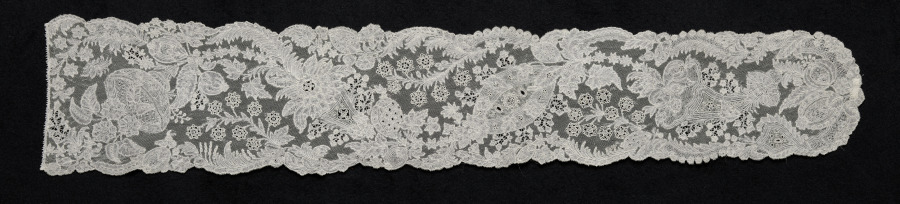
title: Lace Lappet (one of a pair)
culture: Belgium, Brussels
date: 1730s–40s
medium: noncontinuous bobbin lace (Point d'Angleterre) (double-stitched ground) with added needle lace; linen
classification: Lace